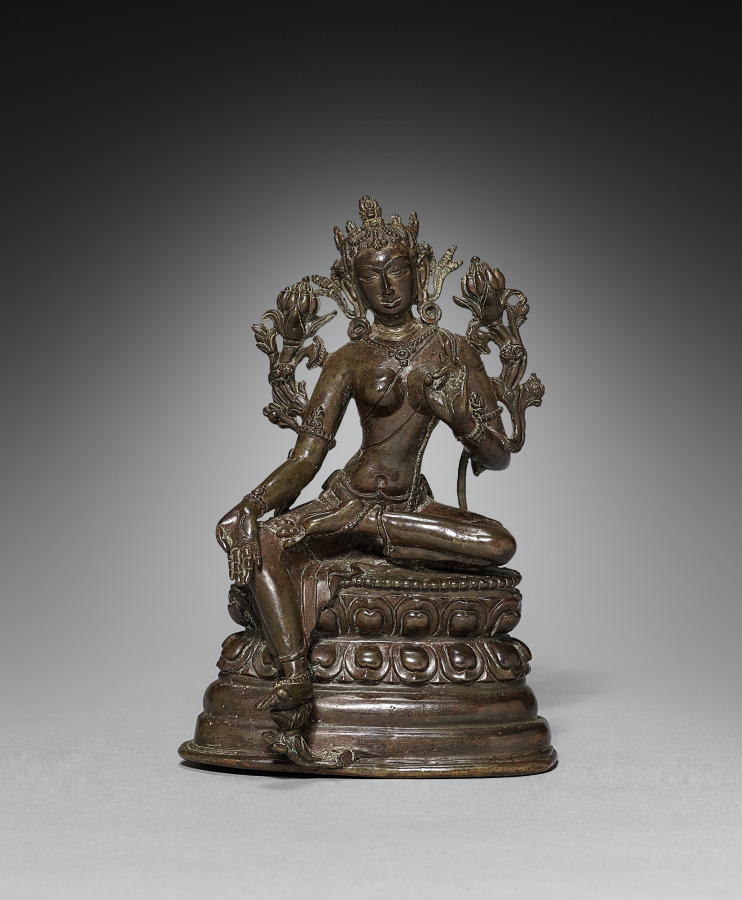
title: Seated Tara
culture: India, Bengal, late Pala dynasty, 12th Century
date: 1100s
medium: bronze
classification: Sculpture